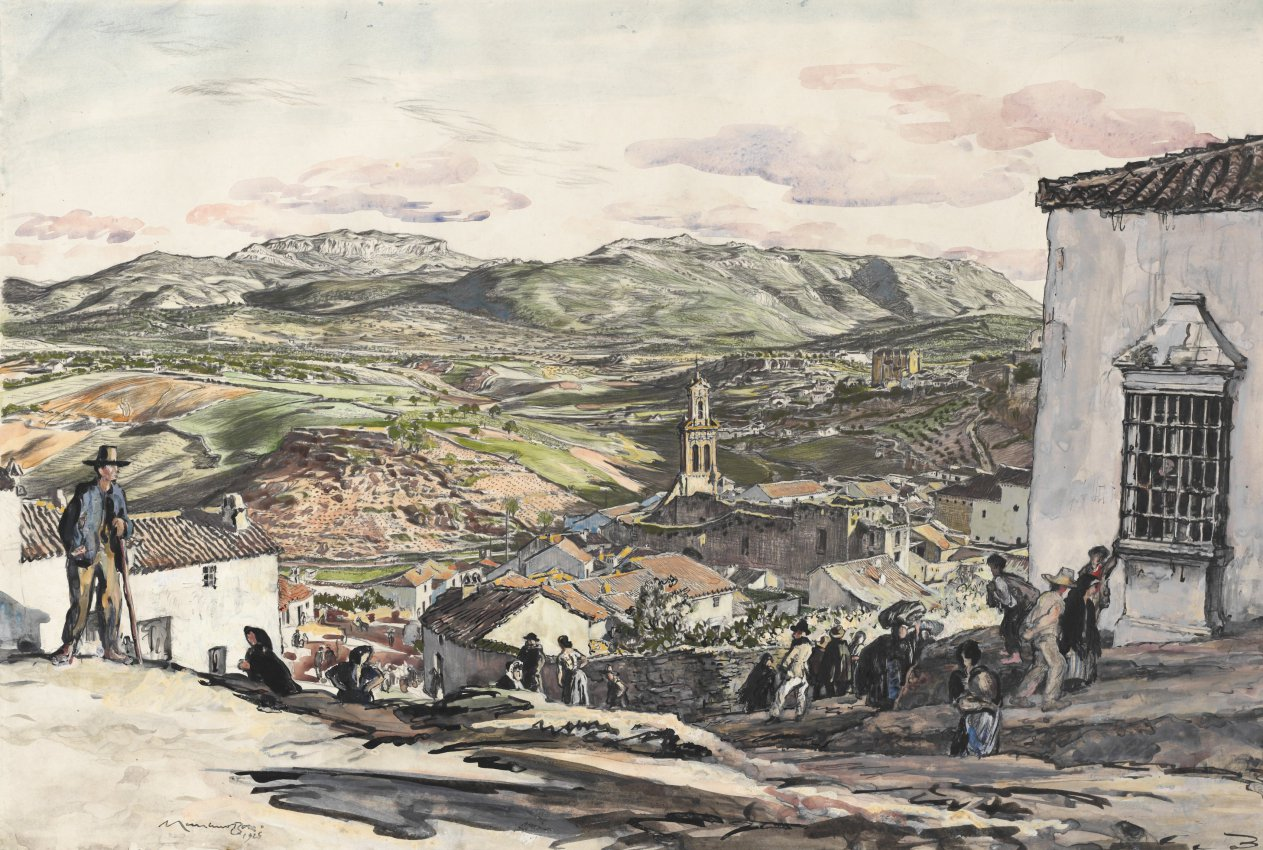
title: Andalusia, Spain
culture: England, 20th century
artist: Muirhead Bone (British, 1876–1953)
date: 1925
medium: watercolor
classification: Drawing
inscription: Signed in lower left: "Muirhead Bone 1925"